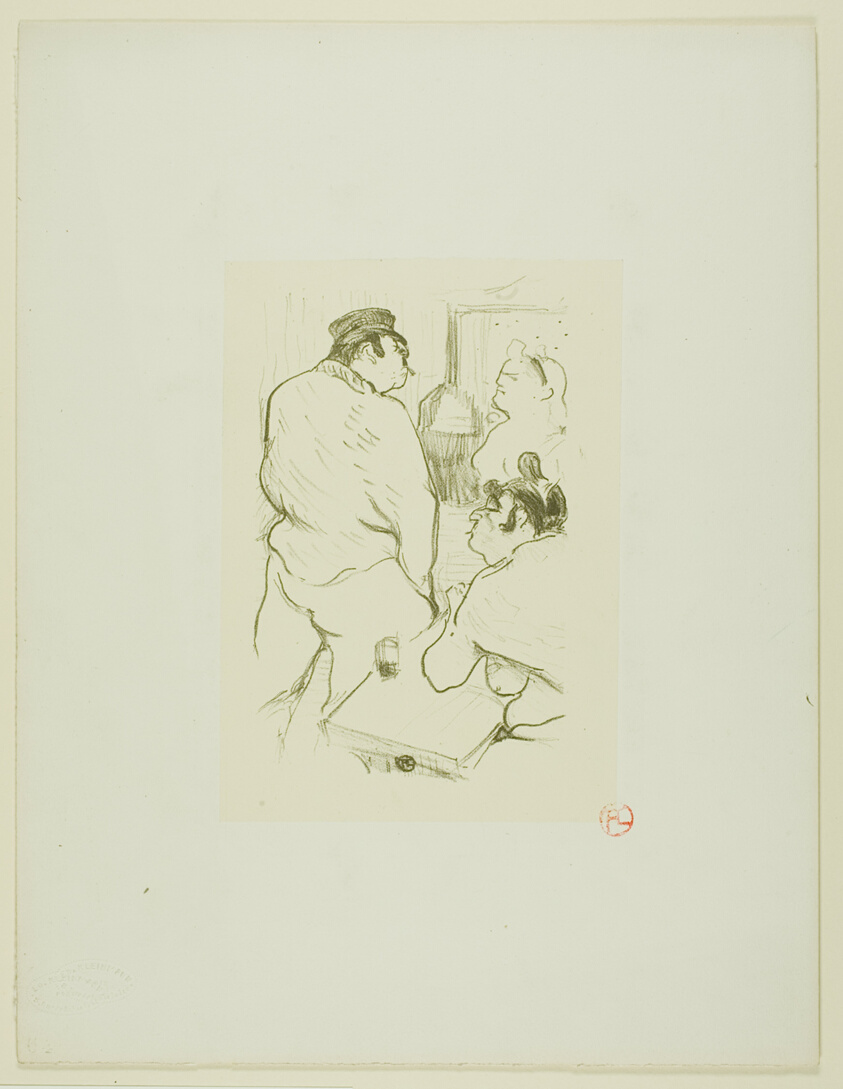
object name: Print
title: The Terror of Grenelle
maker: Henri de Toulouse-Lautrec (French, 1864-1901)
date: 1894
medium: Color lithograph on cream wove paper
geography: France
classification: lithograph; print; prints and drawing